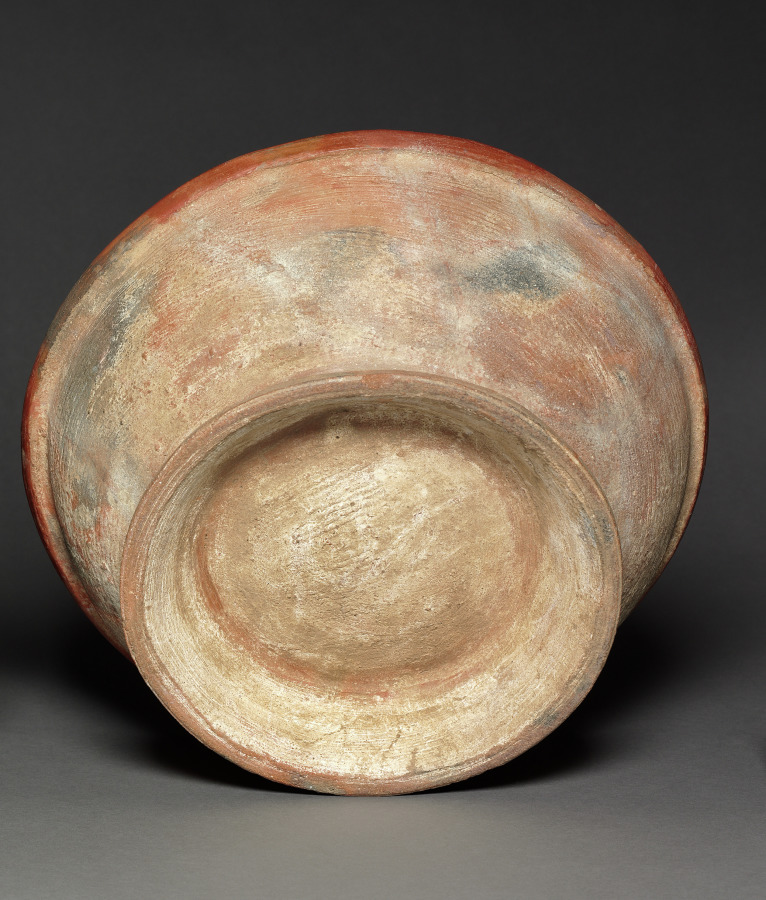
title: Bowl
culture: Costa Rica, Southern Nicoya region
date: c. 600–1100 (Thermoluminescence date, 995–1395)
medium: ceramic, slip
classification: Ceramic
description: Fine ceramics like this were buried in the graves of the high-status dead, some of them certainly leaders of the several groups that competed in the area.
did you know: The lid of this bowl features an iguana.